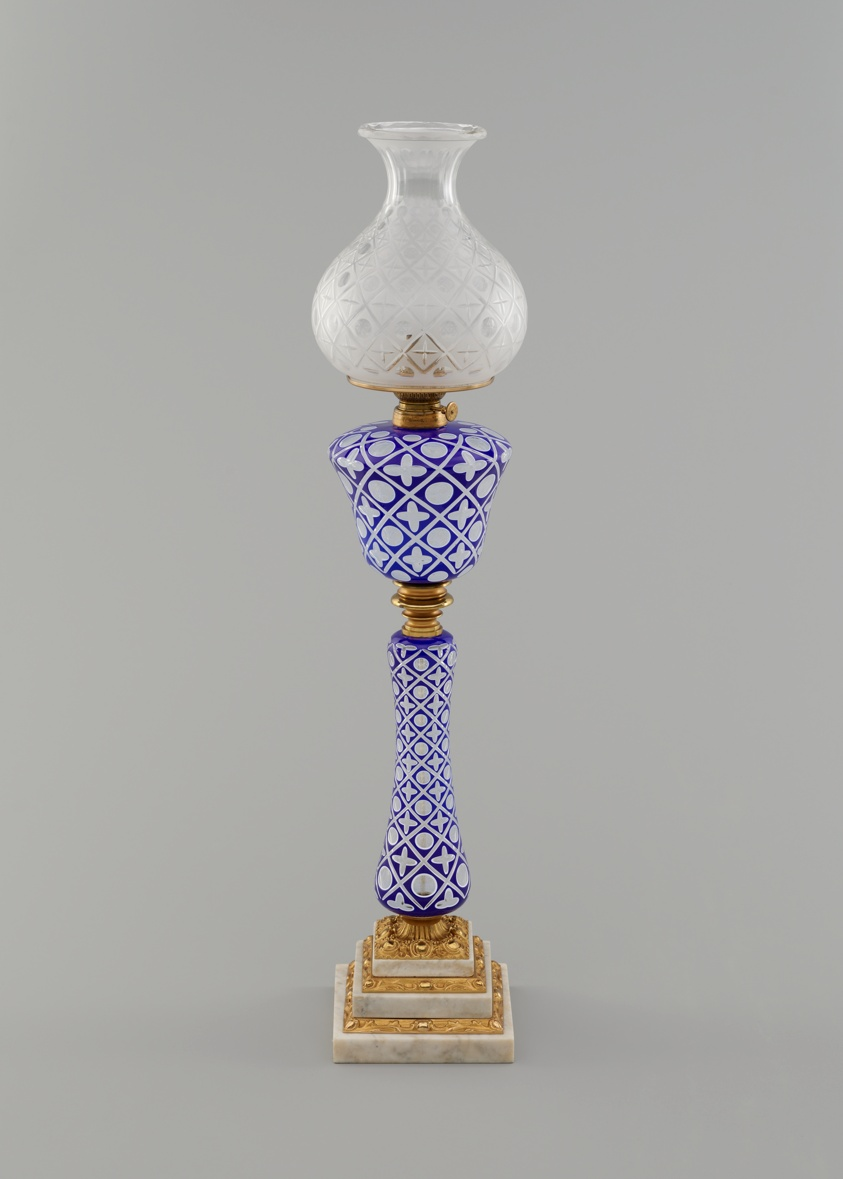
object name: Glass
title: Double-Plated Lamp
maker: Boston and Sandwich Glass Company (American, 1825–1888); Sandwich, Massachusetts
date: c. 1865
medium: Cobalt blue, opaque white, and clear glass, gilt bronze, and marble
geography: Sandwich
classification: lamp (lighting device); glass; american decorative arts; american arts; decorative arts